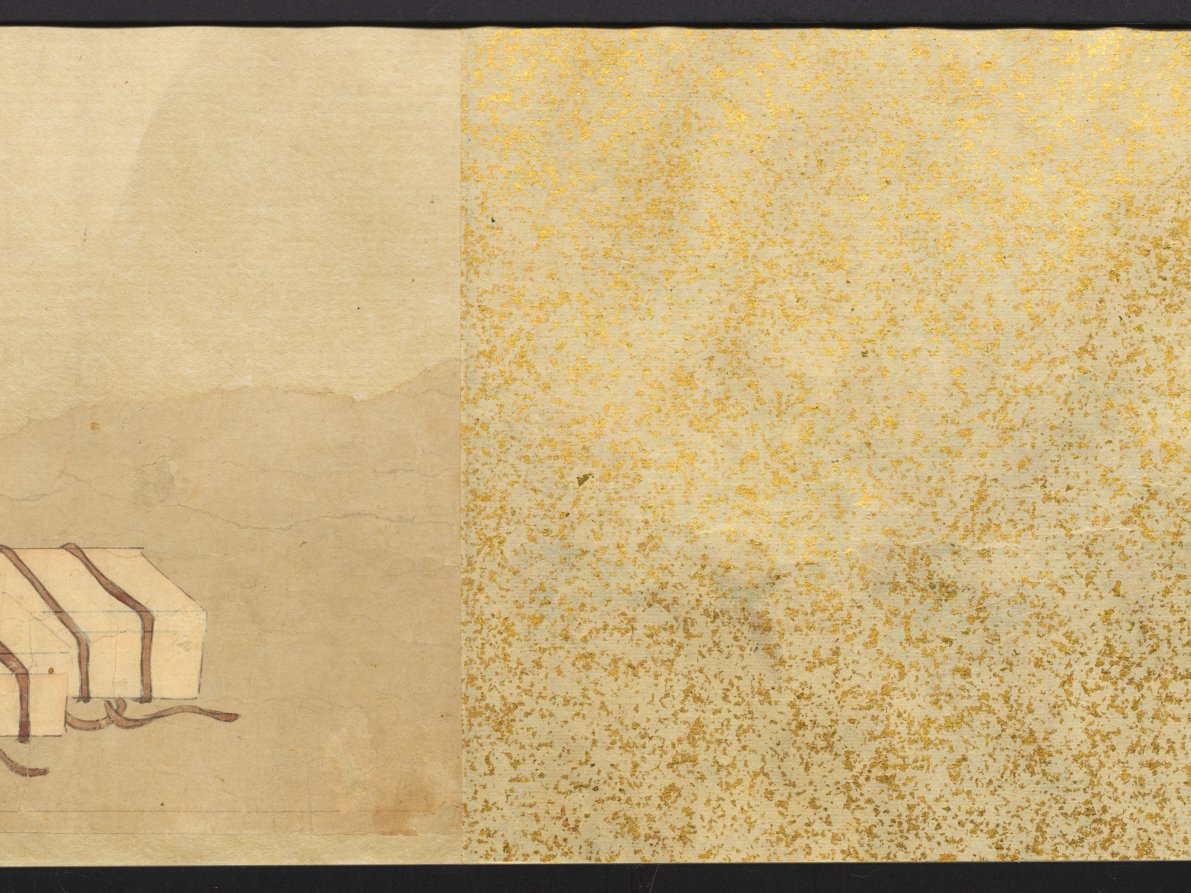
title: The Saltmaker's Story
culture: Japan, Edo period (1615–1868)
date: early 1600s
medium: One of a pair of handscrolls; ink, color, and gold on paper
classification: Painting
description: Once read and copied by girls at New Year’s celebrations and included in dowries, The Saltmaker’s Story is a rags-to-riches tale in which daughters are gifts from the gods. Despite his simple outlook, the main character progresses from humble roots as an associate at Kashima Shrine to the elite status of grandfather of the emperor through the intervention of the Kashima deity. The Saltmaker’s Story is traditionally presented in a set of three scrolls, but the text of this set has been removed by a previous owner, who remounted the illustrations as a pair. The paintings of this one take us from right to left through the second half of the tale.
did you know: This handscroll originally had texts before its paintings, but the texts were removed.